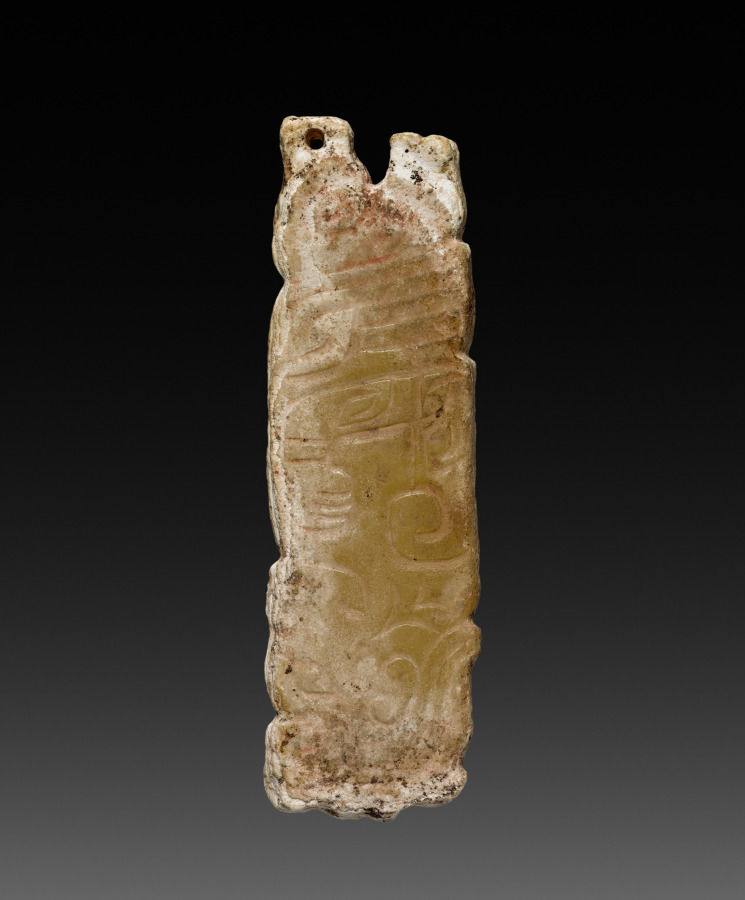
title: Plaque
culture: China, Western Zhou dynasty (c. 1046–771 BCE)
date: c. 1000–900 BCE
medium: calcite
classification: Jade